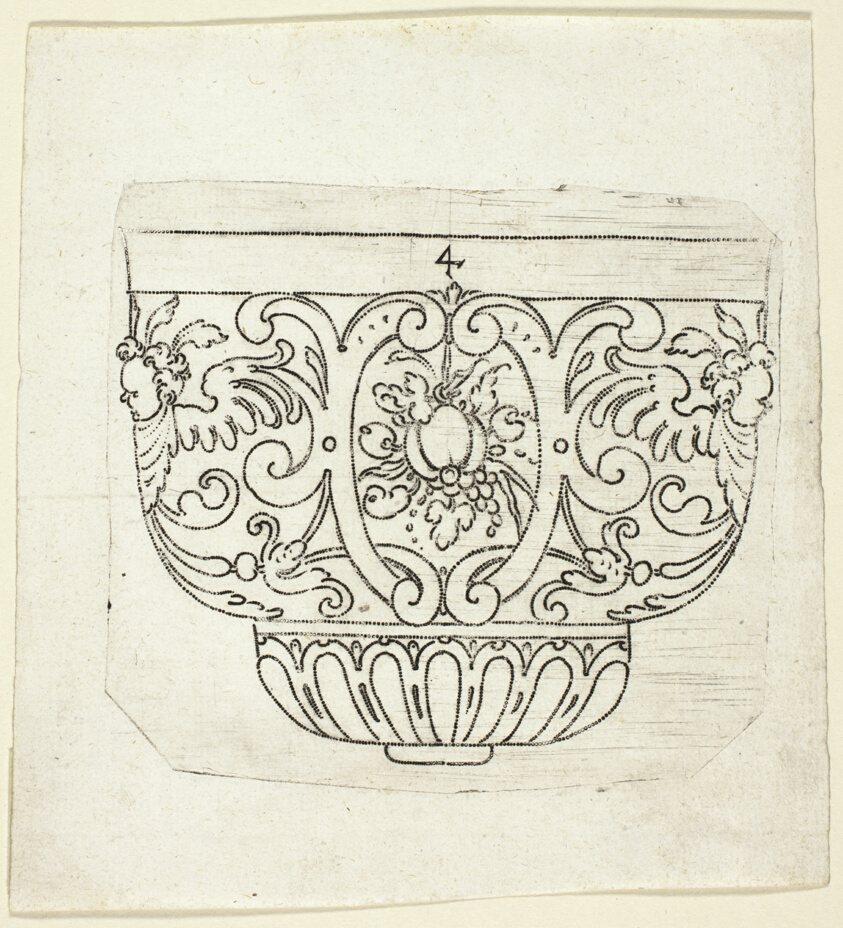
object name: Print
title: Plate 4, from XX Stuck zum (ornamental designs for goblets and beakers)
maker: Master A.P. (German, active early 17th century)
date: 1601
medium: Punch engraving in black on ivory laid paper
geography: Germany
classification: engraving; print; prints and drawing